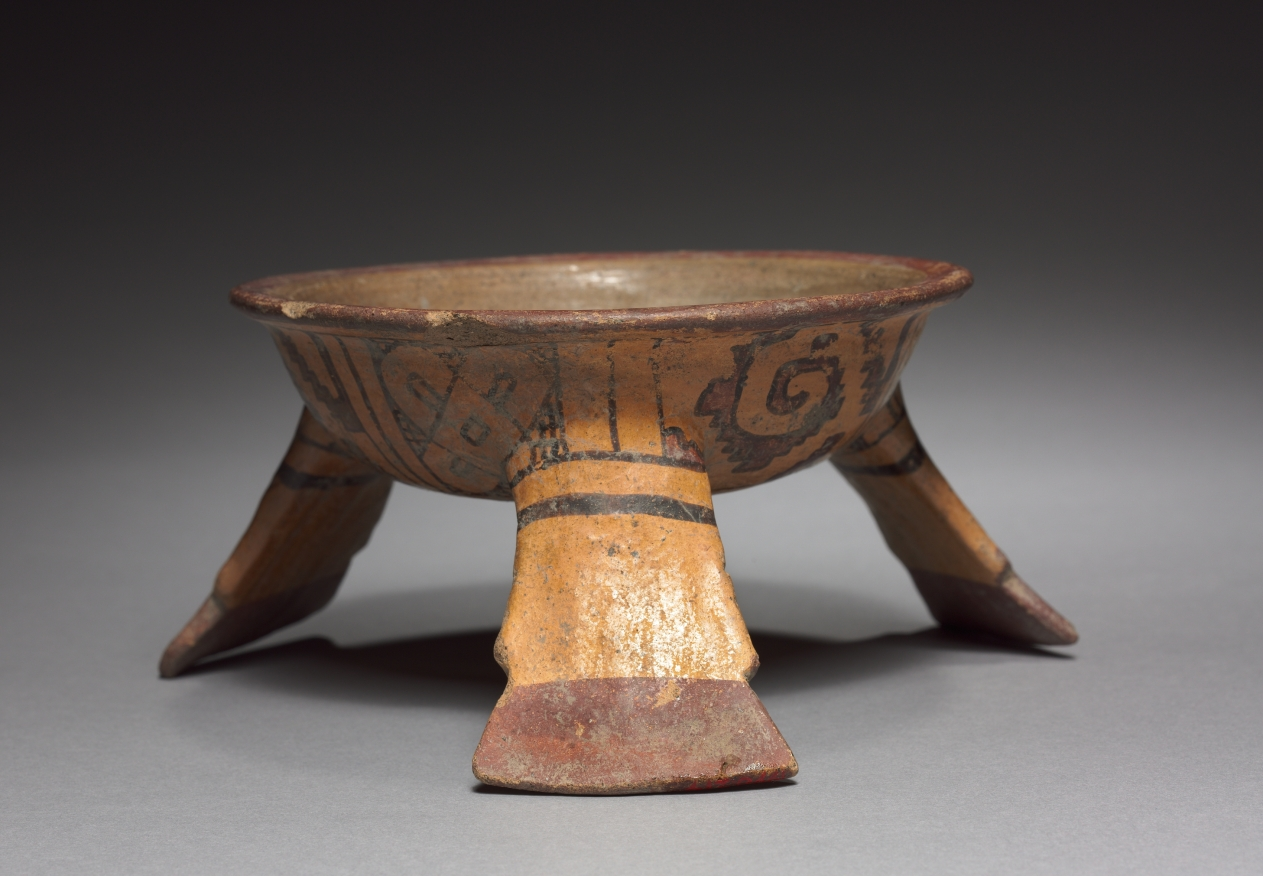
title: Tripod Bowl with Painted Underside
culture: Mexico, Oaxaca, Mixtec, 13th-16th century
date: 1200–1519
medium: pottery with burnished, colored slips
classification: Ceramic